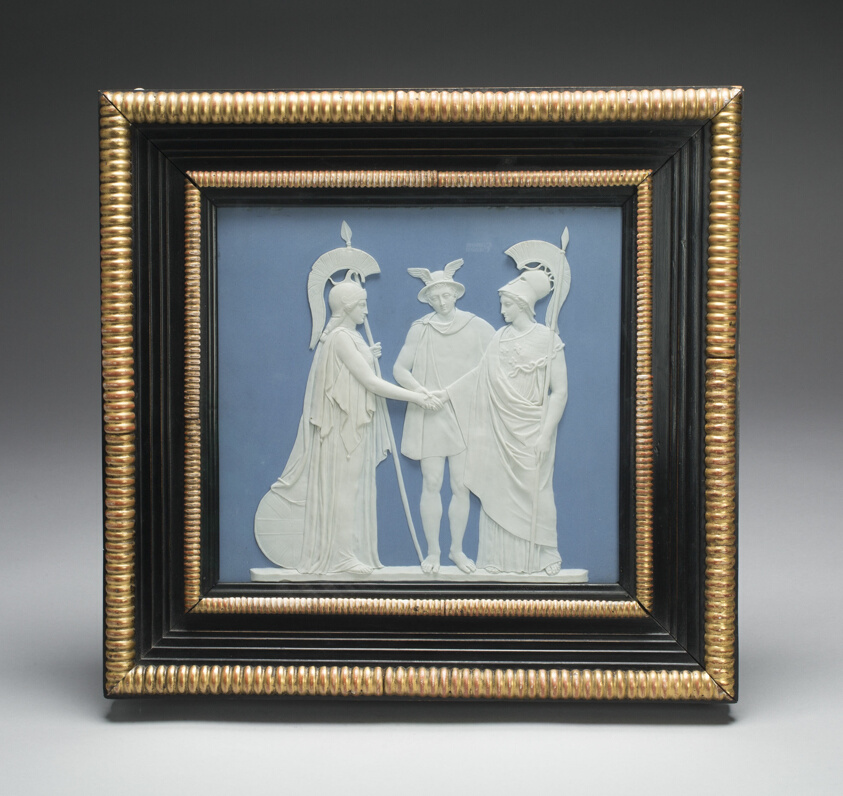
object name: Ceramics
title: Mercury Joining the Hands of Britain and France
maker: Wedgwood Manufactory; England, founded 1759; Etruria, Staffordshire, England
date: 1787/90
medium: Stoneware (jasperware), gilded wooden frame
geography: Burslem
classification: sculpture; stoneware; european decorative arts; ceramics